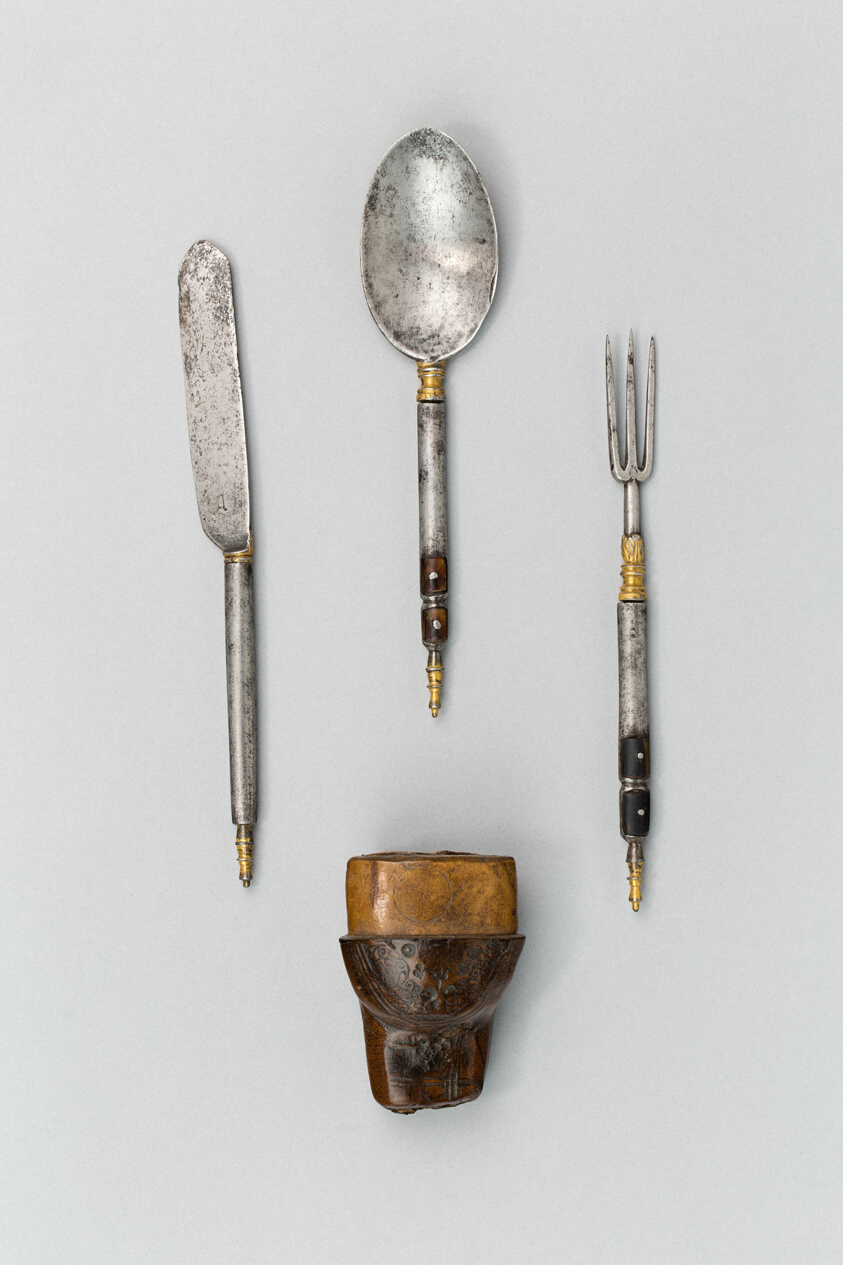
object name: Arms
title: Knife, Fork and Spoon with Cap of a Trousse-Sheath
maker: European, possibly Italian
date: late 17th century(?)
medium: Iron, horn, and leather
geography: Europe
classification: cutlery; arms and armor, miscellaneous; arms and armor; arms